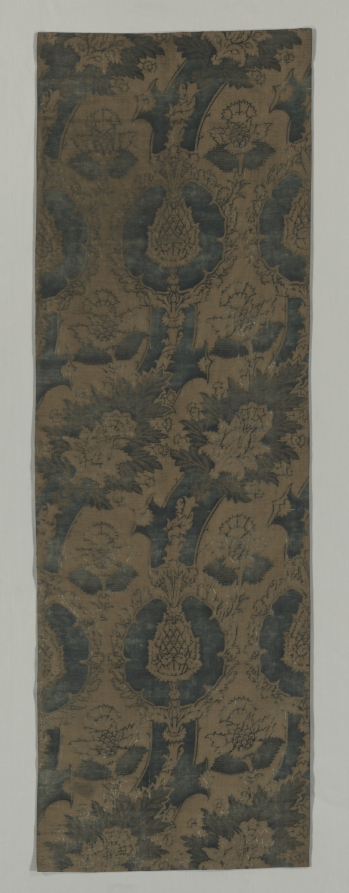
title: Reproduction of a Florentine Velvet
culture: Italy, Venice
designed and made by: Mariano Fortuny y Madrazo (Spanish, 1871–1949)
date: early 20th century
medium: plain weave cotton, printed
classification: Textile